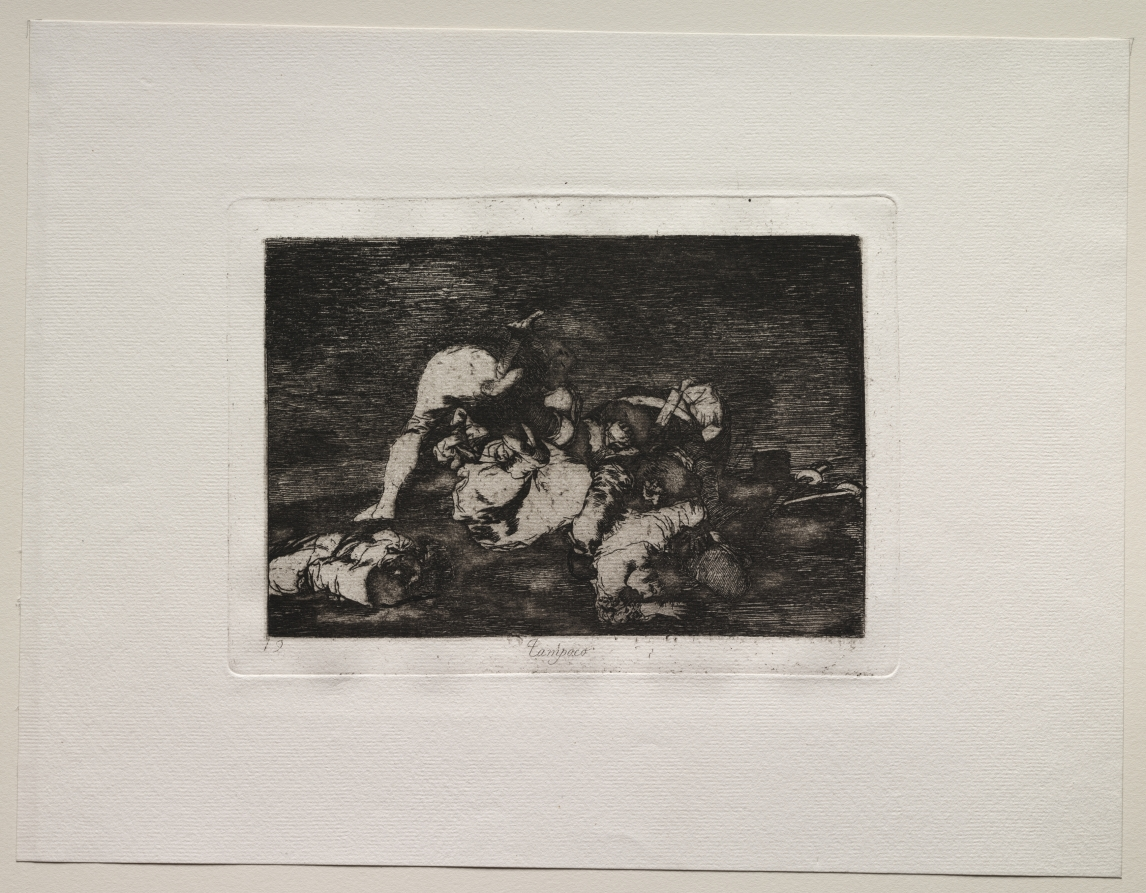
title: The Horrors of War: Nor (Do These) Either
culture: Spain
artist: Francisco de Goya (Spanish, 1746–1828)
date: c. 1810–20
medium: etching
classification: Print